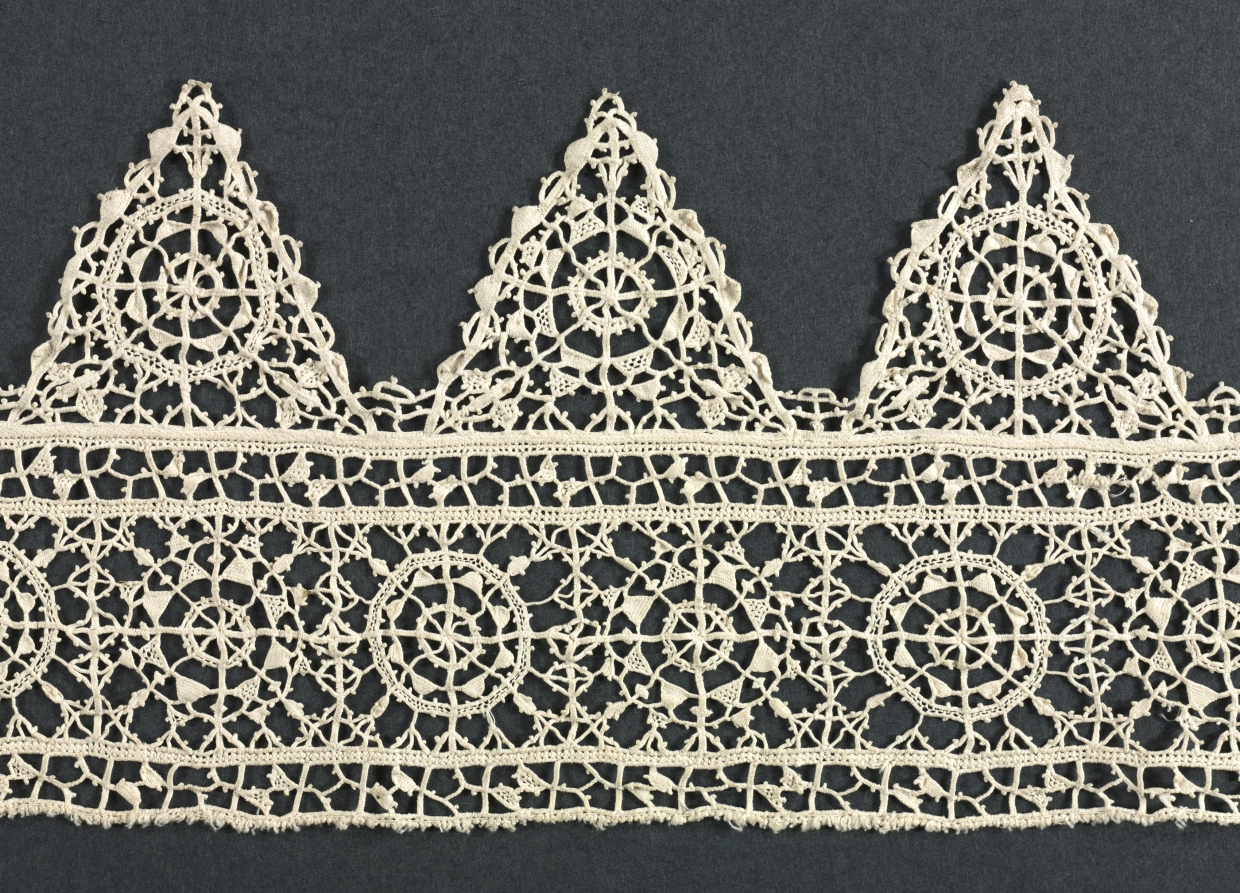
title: Lace Fragment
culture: Italy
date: 1500s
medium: Needle lace (reticella) insertion and edging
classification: Lace